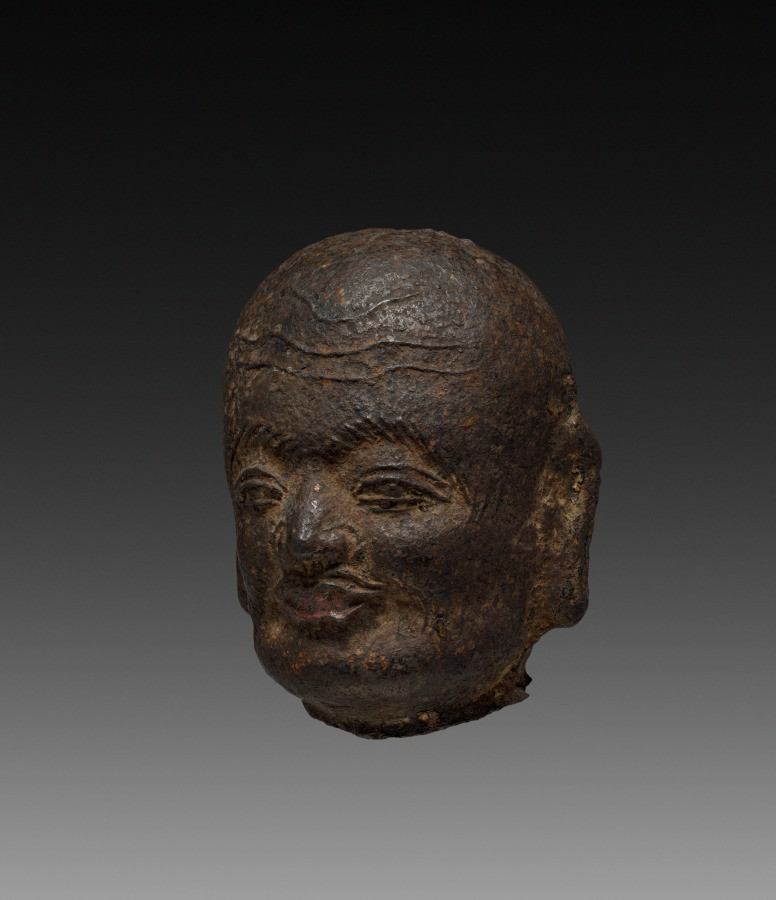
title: Head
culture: China, Song dynasty (960-1279)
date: 960–1279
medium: iron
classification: Sculpture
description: The shaven head and face of this ascetic expresses character and personality. It may have once been part of a figure of a monk or lohan, an enlightened being with supernatural power.